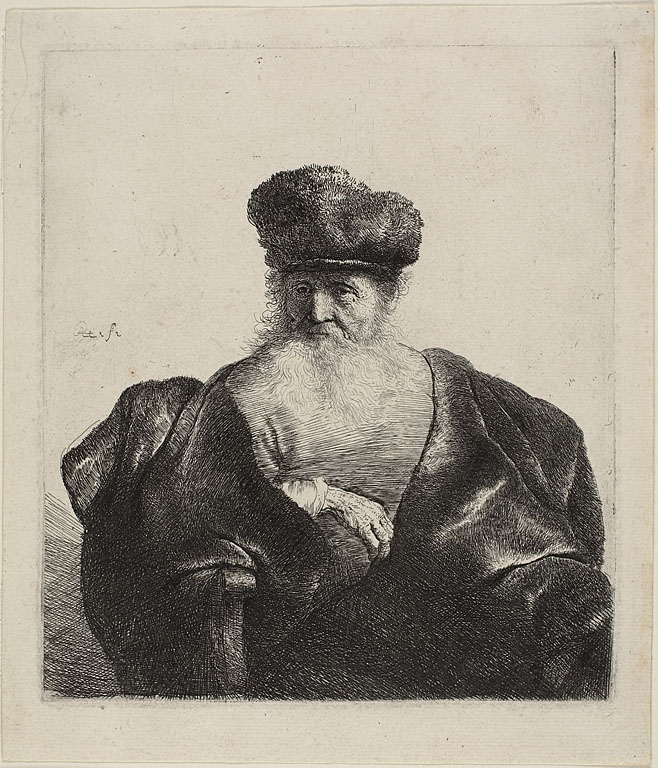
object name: Print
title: Old Man with Beard, Fur Cap, and Velvet Cloak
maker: Rembrandt van Rijn (Dutch, 1606-1669)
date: c. 1631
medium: Etching on paper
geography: Holland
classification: etching; print; prints and drawing; paper